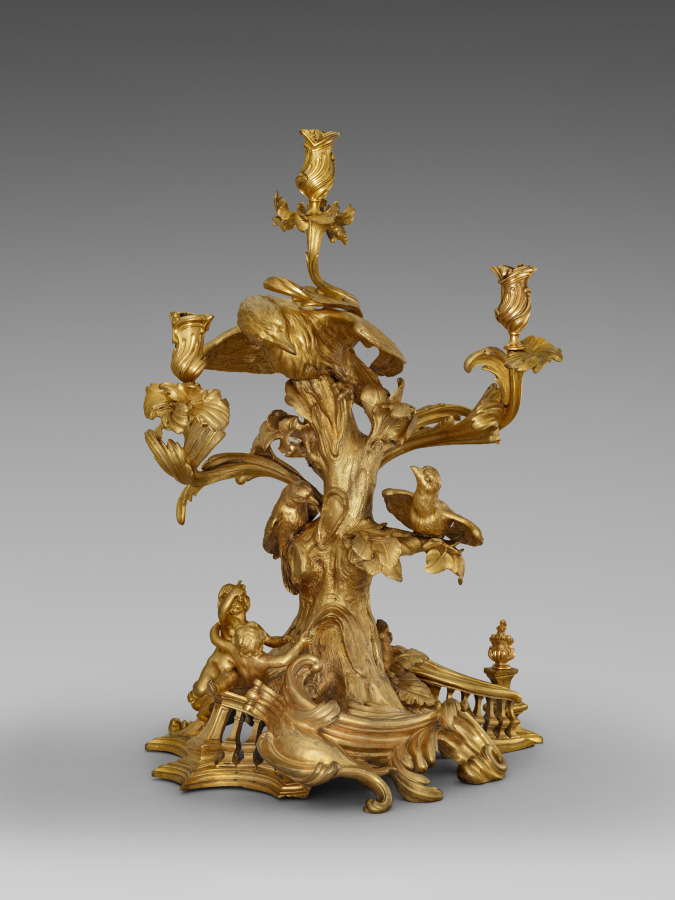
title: Candelabrum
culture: France, 18th century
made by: probably by Jean Joseph de Saint-Germain (French, 1720–1791)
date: c. 1750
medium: gilt bronze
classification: Furniture and woodwork